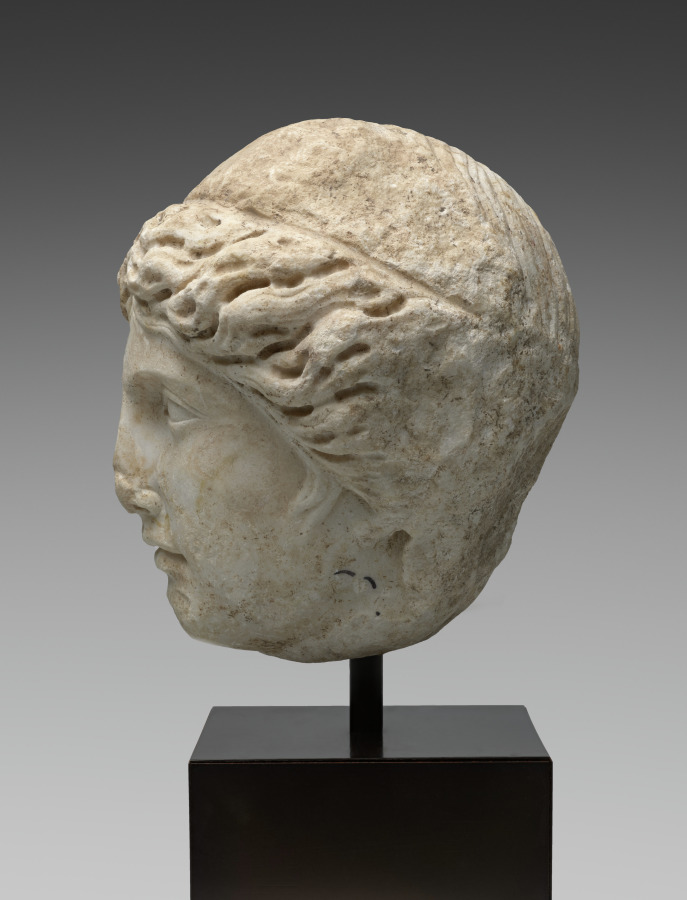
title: Head of Apollo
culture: Roman, Imperial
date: 1–200 CE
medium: marble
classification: Sculpture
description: This marble head, about three-quarter life-sized with idealized features, likely represents Apollo, the god most renowned for his youthful beauty. The hair spreads from a central part, flowing to either side in long and deeply drilled locks that cover the ears. An incised line separates these locks from a rougher area above, probably reserved for a separately made diadem or wreath, likely of metal.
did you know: This head of Apollo has also been identified as female, perhaps a Muse or other goddess.